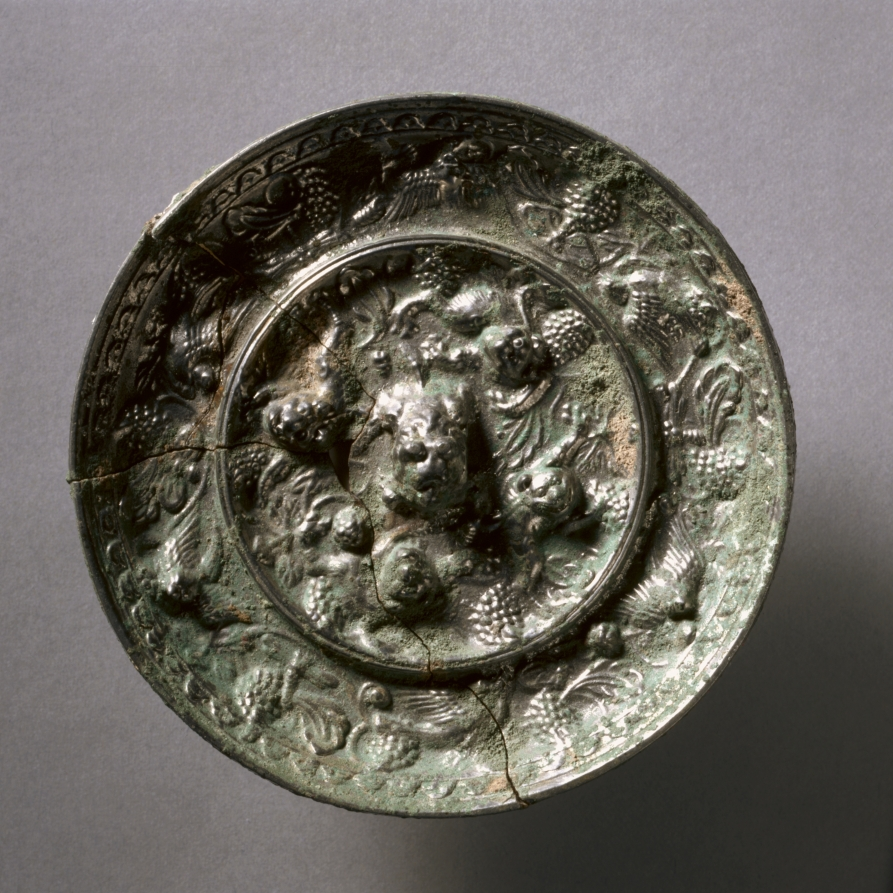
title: Animal-and-Grape Mirror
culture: China, Tang dynasty (618-907)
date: early 600s–early 900s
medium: bronze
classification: Metalwork